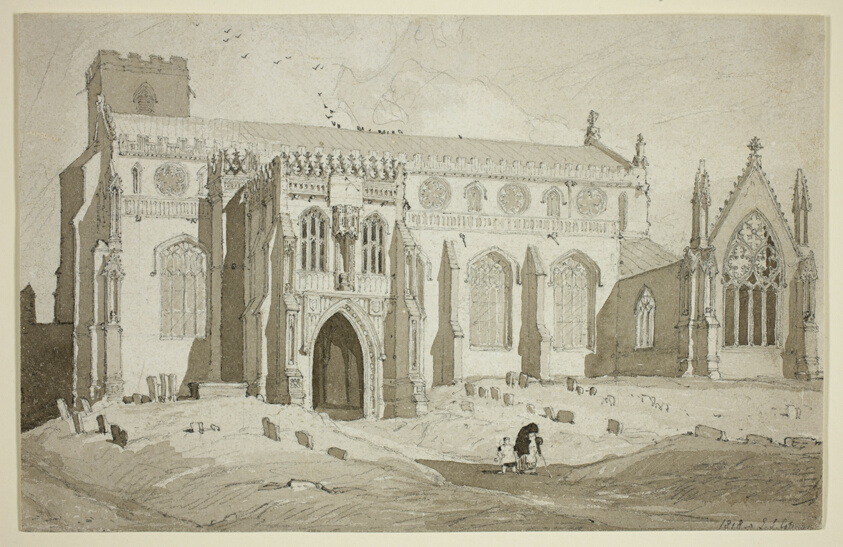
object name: Drawing and Watercolor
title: Cley Church, Norfolk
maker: John Sell Cotman (English, 1782-1842)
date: 1818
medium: Graphite and gray wash on ivory wove paper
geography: England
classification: graphite; prints and drawing; paper